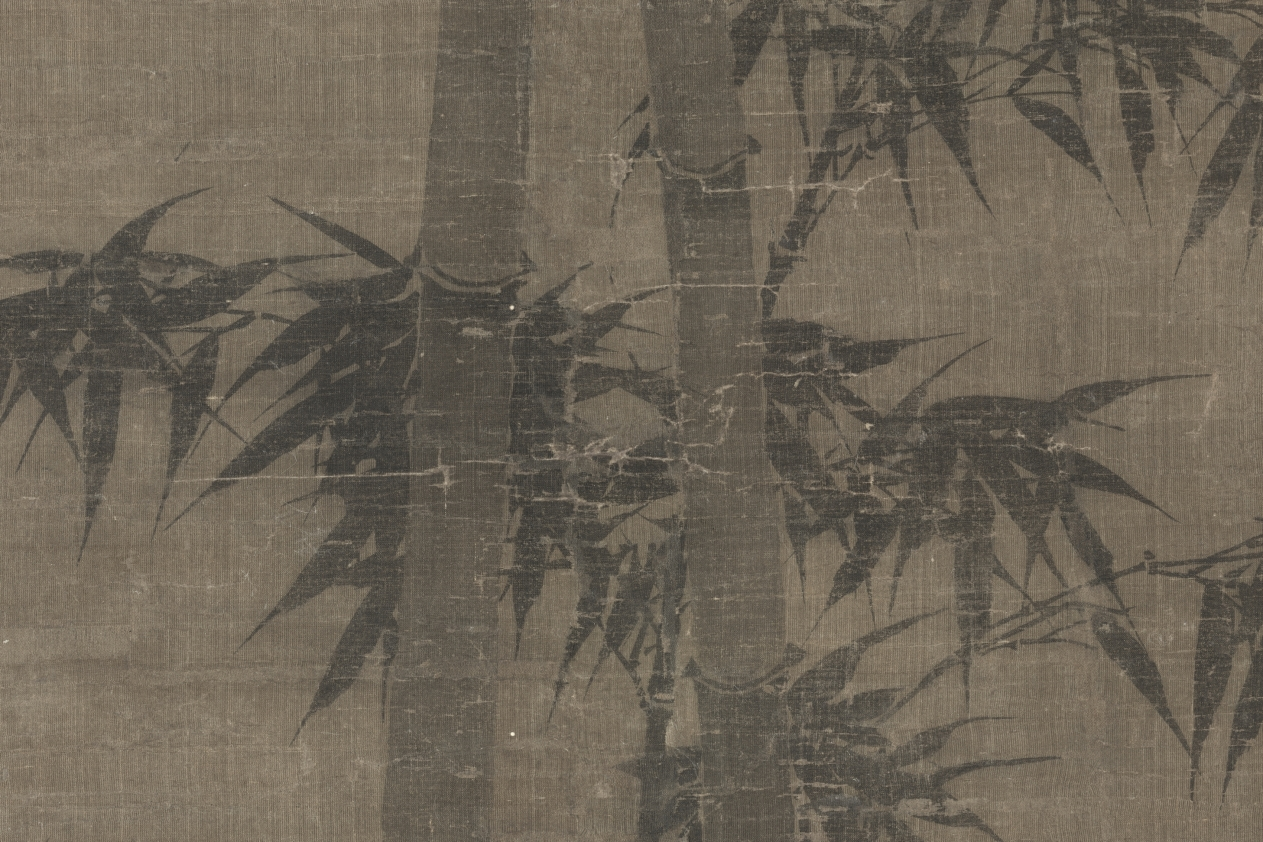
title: Bamboo in Four Seasons: Autumn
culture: China, Yuan dynasty (1271-1368)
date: 1279–1368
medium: hanging scroll, ink on silk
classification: Painting